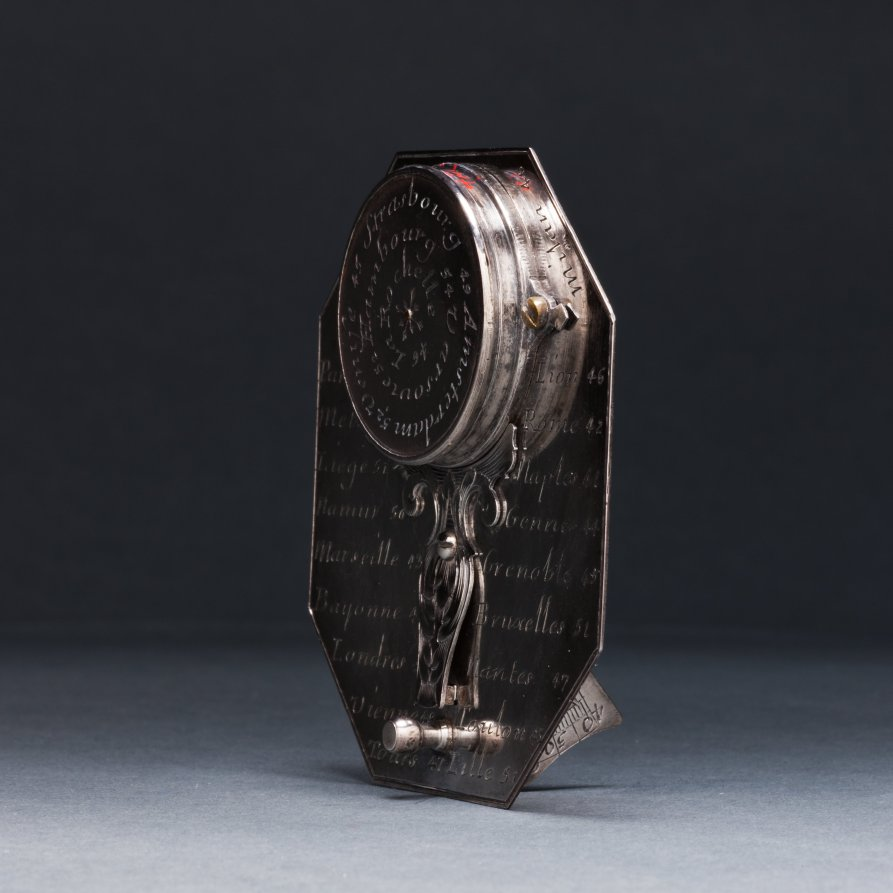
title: Butterfield Sundial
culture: France, 18th century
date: 1700s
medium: silver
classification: Silver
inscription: [Engraved signature above the compass in ribbon band]: "N. BION A Paris"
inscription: [Engraved on the face of the sundial]: “Pour 55° 4-5-6-7-8-9-10-11 50° IIII-V-VI-VII-VIII-IX-X-XI 45° 5-6-7-8-9-10-11 40° -VI-VII-VIII-IX-X-XI'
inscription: [Engraved on the other side]: "Pour 55° -8-7-6-5-4-3-2-1-0 50°-VIII-VII-VI-V-IIII-III-II-I 45°-8-7-6-5-4-3-2-1 40°-VII-VI-V-IIII-III-II-I"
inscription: [Engraved around the compass]: “NORD-OUEST-SUD-EST”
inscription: [Engraved on the back of the sundial]: “Turin 44 Milan 46 Paris 49 Lion 46 Metz 49 Rome 42 Liege 51 Naples 44 Namur 50 Gennes 44 Marseille 43 Grenoble 45 Bayonne 43 Bruxelle 51 Londres 52 Nantes 47 Vienne 48 Toulon 43 Tours 47 Lille 51”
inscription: [Engraved around the back of the compass]: “Venise 45 Strasbourg 49 Amsterdam 52 Hambourg 54 Varsovie 52 La Rochelle 46”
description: Butterfield-type sundials are characterized by their adjustable gnomons, metal flaps that cast a shadow on the dial’s face to indicate the hour, and geographical indices. This sundial has a scale adjustable between latitudes of 40° to 60° north. The latitudes of 26 European towns are engraved on its back for quick reference. With an intricately engraved silver face, it would have functioned as a fashionable traveler’s accessory.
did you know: Butterfield-style sundials were named after Micheal Butterfield, an English scientific and mathematical instrument maker who worked in Paris between 1674 and 1724.